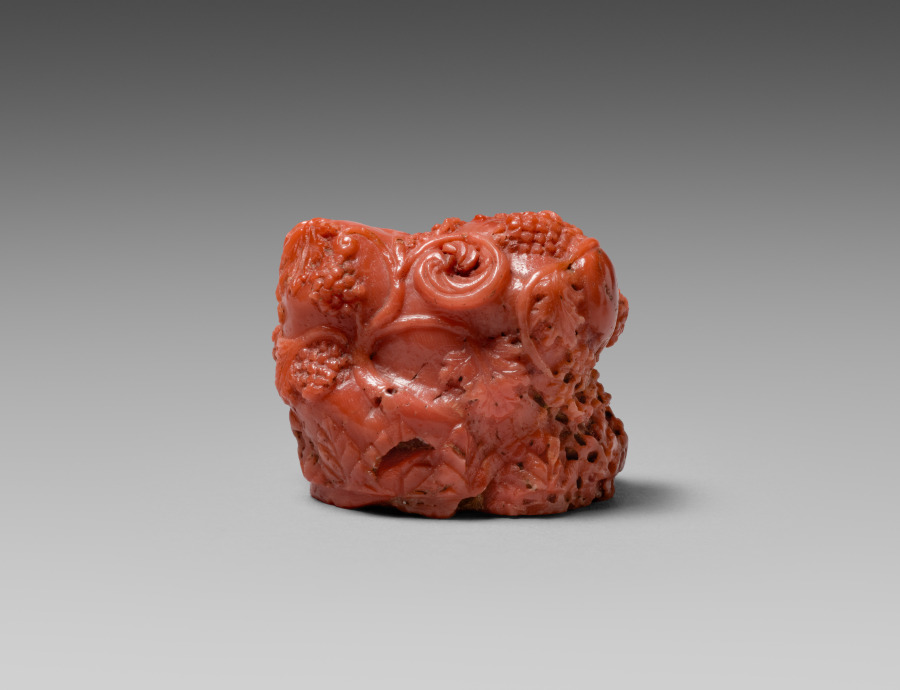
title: Sword Hilt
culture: Pakistan, Gandhara, Kushan period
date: c. 100s–200s CE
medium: coral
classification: Sculpture